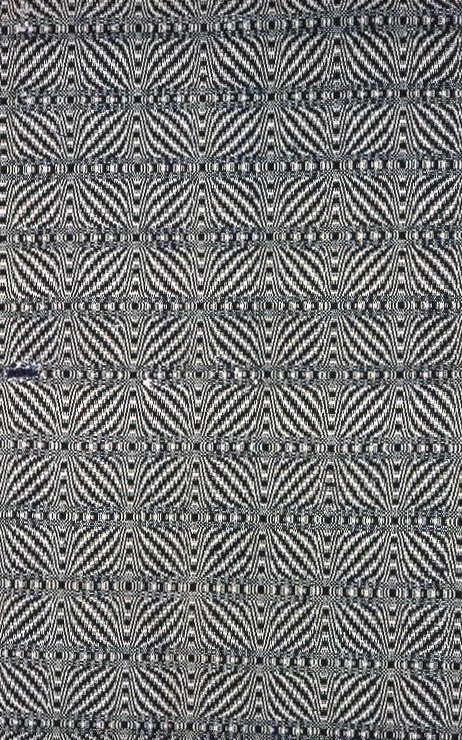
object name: Textile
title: Coverlet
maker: United States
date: 1825/35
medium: Cotton and wool, plain weave with supplementary patterning wefts (overshot); two loom widths joined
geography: United States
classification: textile; coverlet; weaving - coverlet; weaving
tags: coverlet